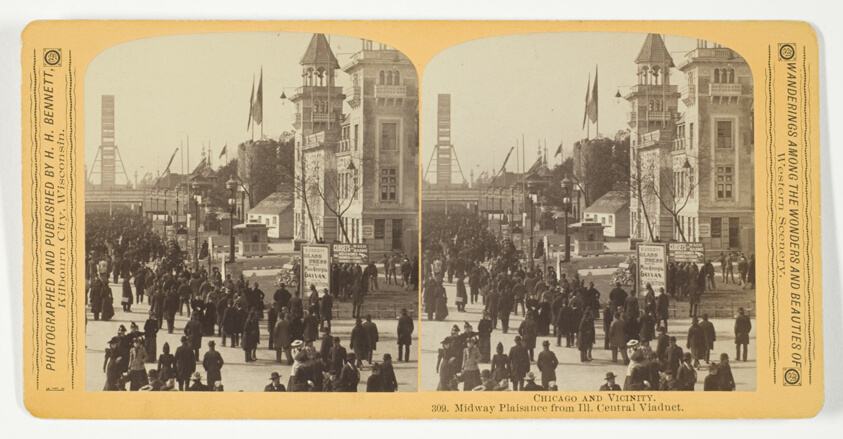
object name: Photograph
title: Midway Plaisance from Ill. Central Viaduct, from the series "Chicago and Vicinity"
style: 19th century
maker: Henry Hamilton Bennett (American, born Canada, 1843-1908)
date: 1887/93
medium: Albumen print, stereo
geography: Chicago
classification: photography; photograph; albumen silver print; stereograph (albumen)